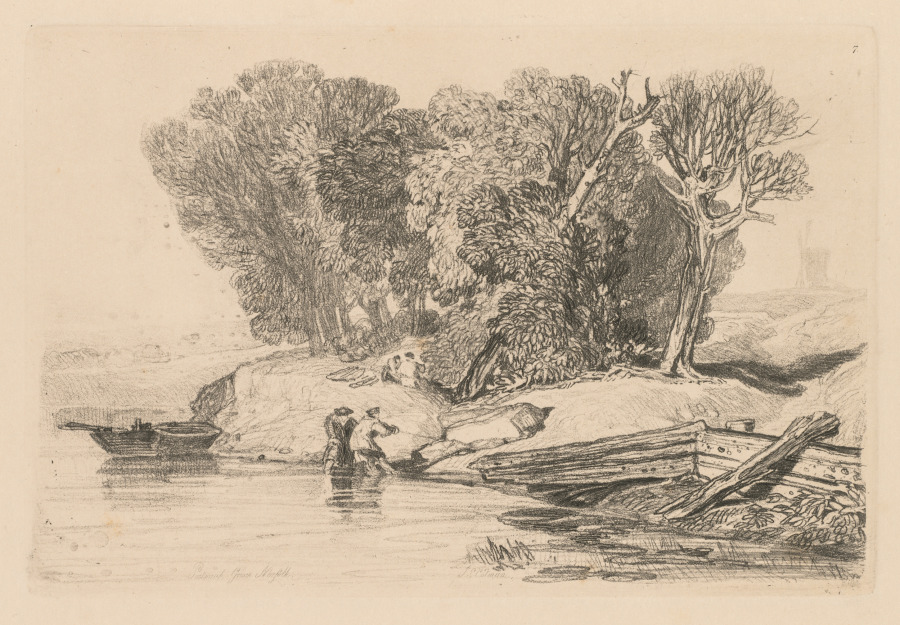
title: Liber Studiorum: Plate 7, Postwick Grove, Norfolk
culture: England, 19th century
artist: John Sell Cotman (British, 1782–1842)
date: 1838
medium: softground etching, from a bound volume containing 48 plates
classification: Bound Volume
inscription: In plate, within image, upper right: 7; in plate, below image: Postwick Grove, Norfolk